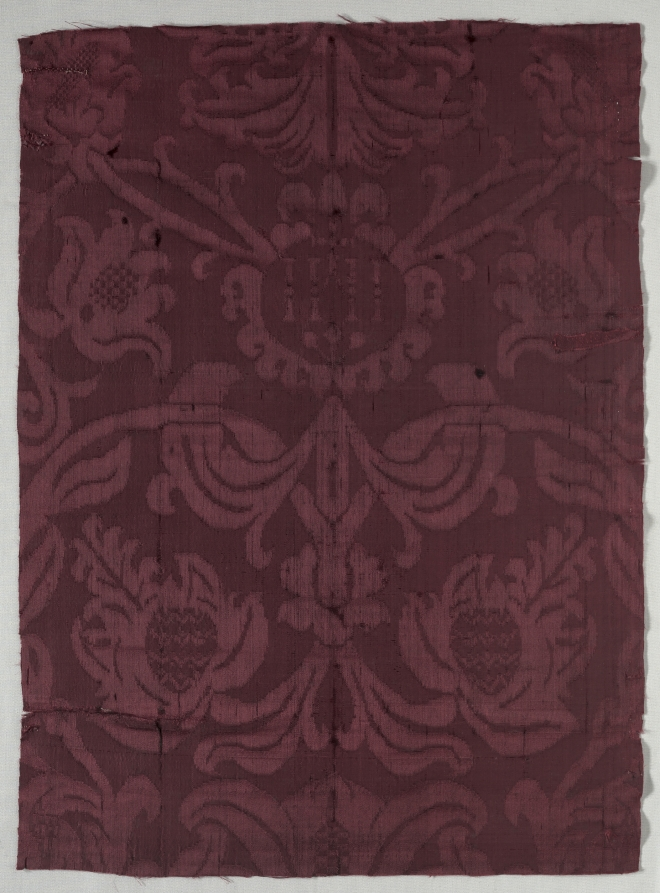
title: Silk Fragment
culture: Italy or Spain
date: late 1600s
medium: damask, silk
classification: Textile